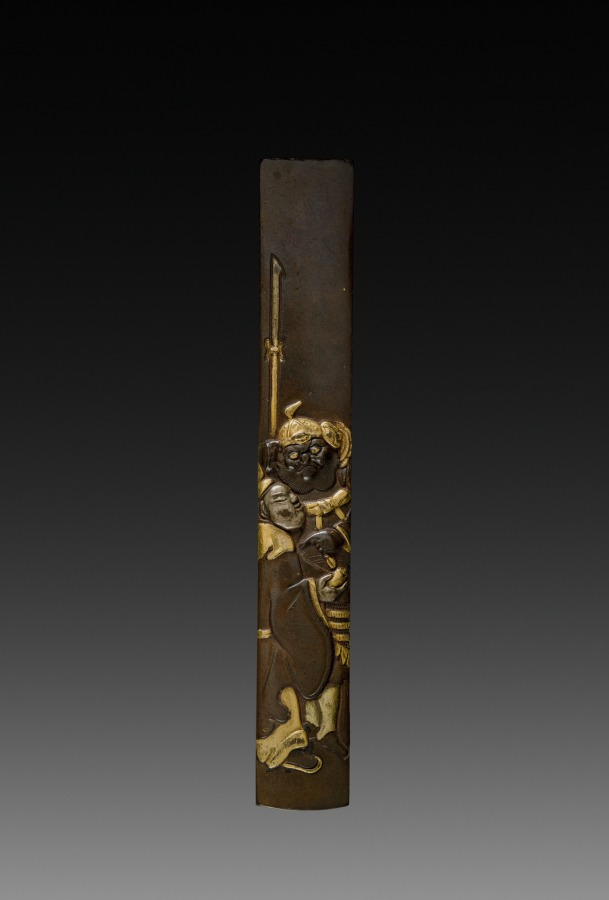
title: Knife Handle (Kozuka)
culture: Japan, Edo period (1615–1868)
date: early to mid-1800s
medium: inlaid bronze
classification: Metalwork